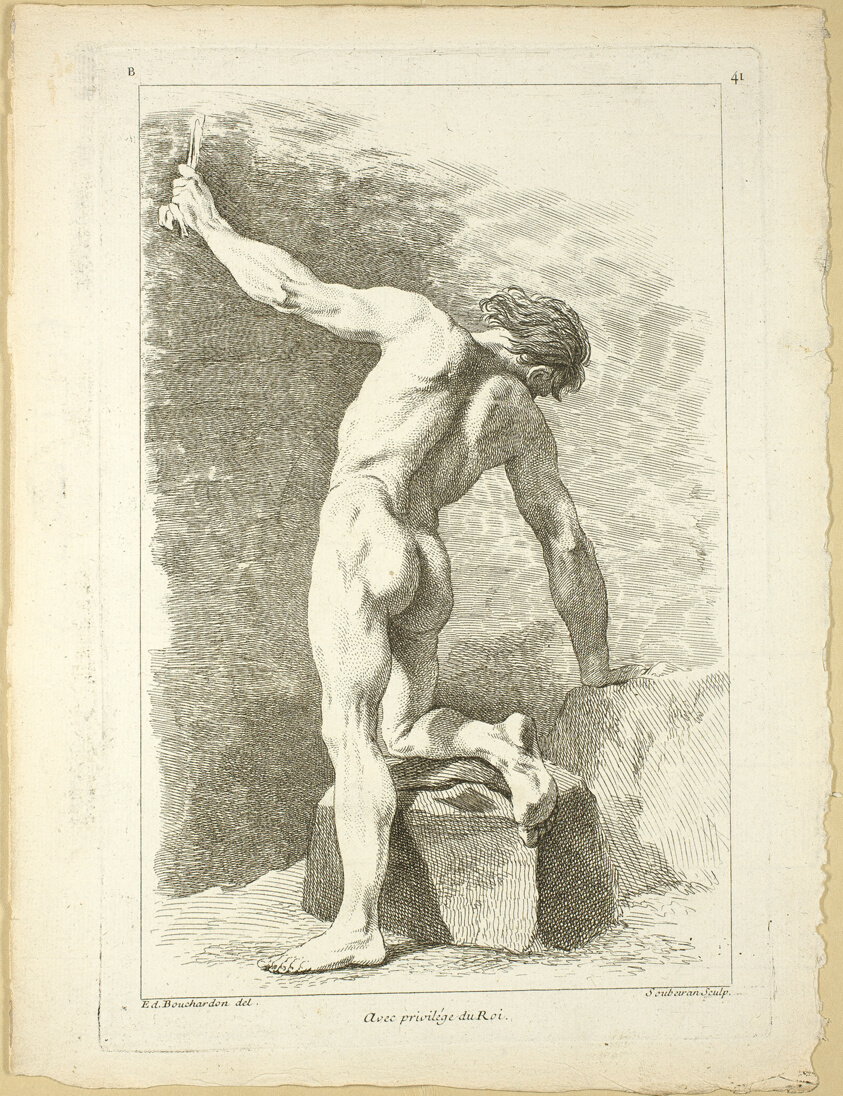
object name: Print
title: Page 41, from Seconde Livre de Figures d'Academies Gravées en Partie par les Professeurs de l’Académie Royale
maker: Pierre Soubeyran (Swiss, 1709-1775); after Edme Bouchardon (French, 1698-1762); published by Charles-Antoine Jombert (French, 1712-1784) (French, 18th century)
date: published 1745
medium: Etching on ivory laid paper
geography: Switzerland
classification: etching; print; prints and drawing